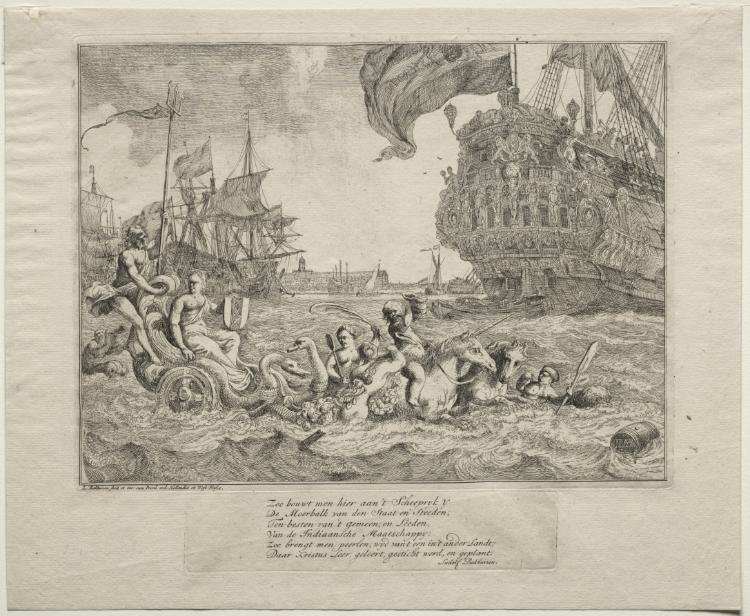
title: The Personification of Amsterdam Riding in Neptune's Chariot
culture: Netherlands, early 18th century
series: The River IJ and Seascapes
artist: Ludolf Backhuysen (Dutch, 1631–1708)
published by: Ludolf Backhuysen (Dutch, 1631–1708)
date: 1701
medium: etching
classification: Portfolio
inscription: top left, on flag, in plate: AMSTERDAM[in reverse] ; lower left, in plate: L. Bakhuizen fecit et exc: cum Privil: ord: Hollandiæ ; lower right, on barrel, in plate: LBAK[in reverse] ; lower center, in separate plate: Zoo bouwt men hier aan't Scheepryk Y / De Moerbalk van den Staat en Steeden, / Ten besten van't gemeen, in Leeden / Van de Indiaansche Maatschappy: / Zoo brengt men peerlen, wyd vant een in't ander Landt; / Daar Kristus Leer, geleert, gesticht werd, en geplant. / Ludolf Bakhuizen. ; lower left, in graphite: D.1. ; VERSO, lower left, in graphite: 10ps_ak_00-"